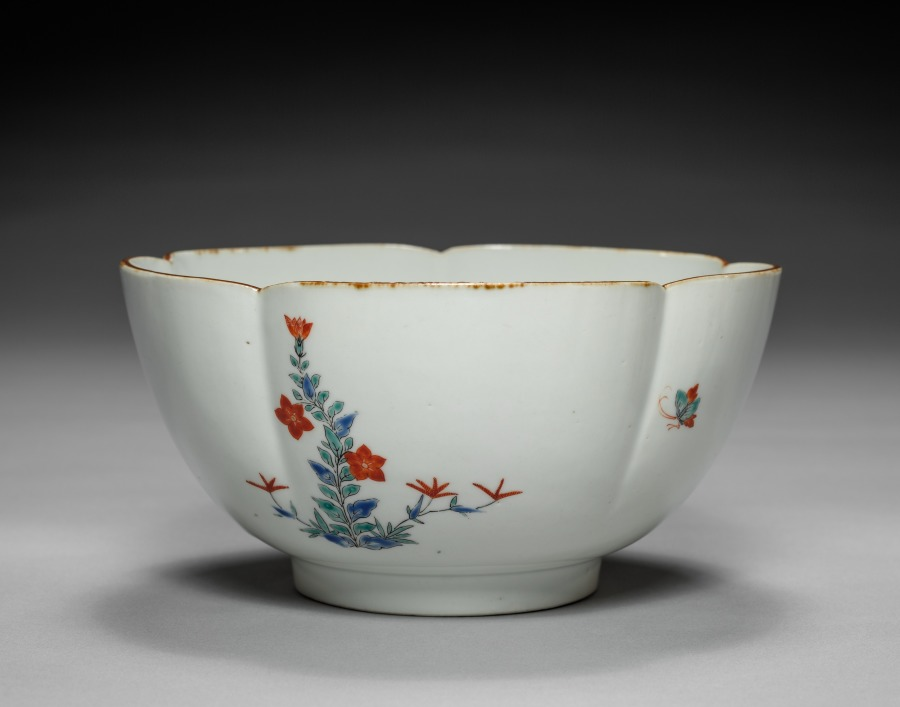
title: Bowl with Butterflies and Flowers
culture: Japan, Edo period (1615–1868)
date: c. 1700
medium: porcelain molded in five lobes, with overglaze color enamel (Hizen ware, Kakiemon type)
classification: Ceramic